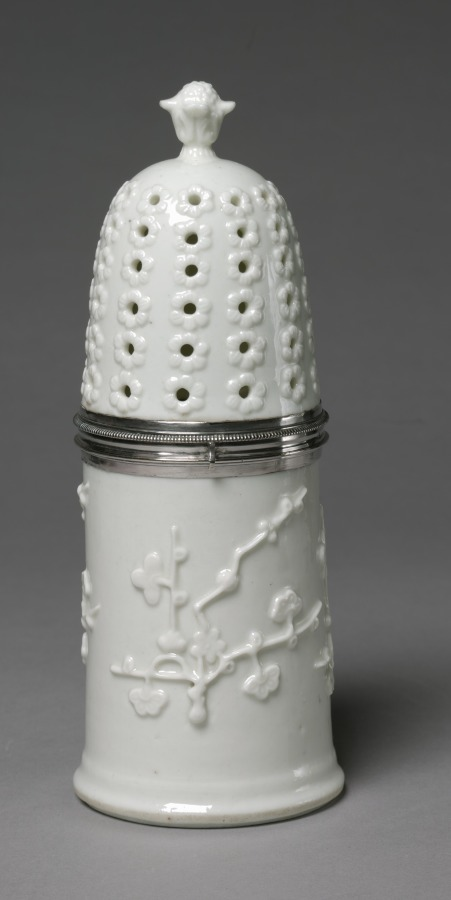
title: Caster (Saupoudreuse)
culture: France, Saint Cloud, 18th century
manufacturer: Saint Cloud Porcelain Factory (French)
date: c. 1732–38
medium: soft-paste porcelain, silver mount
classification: Ceramic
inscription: [Discharge mark of Hubert Louvet, 1732-1738 (Dog's head in profile), on both sections of silver mount]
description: This cylindrical caster with a removable pierced cover may have held sugar. It likely derives its form from silver casters manufactured pre-1700. Its all-white, molded, prunus branch decorations are characteristic of blanc de chine, the term used in France to reference the highly prized porcelain produced in the southeastern Fujian province of Dehua, China, known for its pure color and high degree of translucence.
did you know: Prunus branches, which refer to flowering trees and shrubs including plums, cherries, peaches, nectarines, apricots, and almonds, were a common motif in Chinese porcelain.